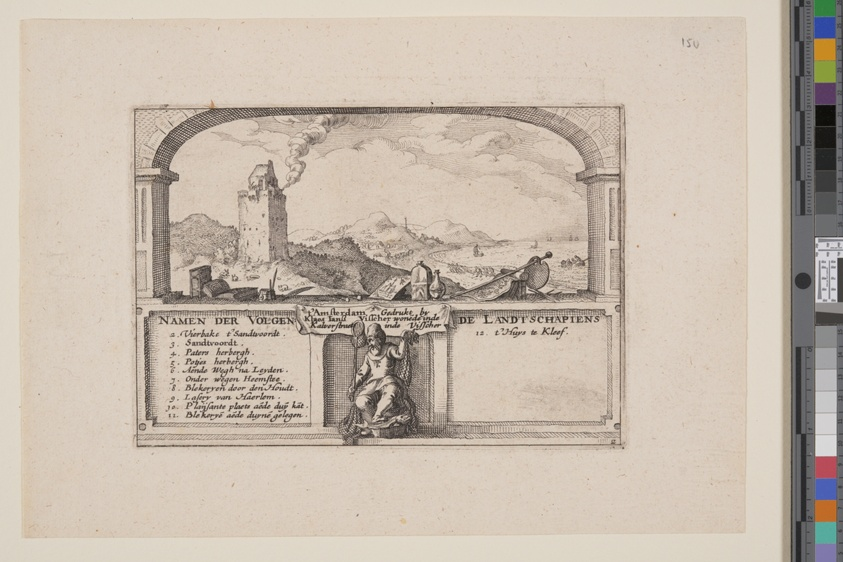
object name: Print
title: Beacon at Zandvoort, from Views in the Surroundings of Haarlem (Plaisante Plaetsen)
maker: Claes Jansz. Visscher (Netherlandish, c. 1550–c. 1612)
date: 1610/20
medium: Etching on ivory laid paper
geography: Netherlands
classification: print; paper; prints and drawing; etching